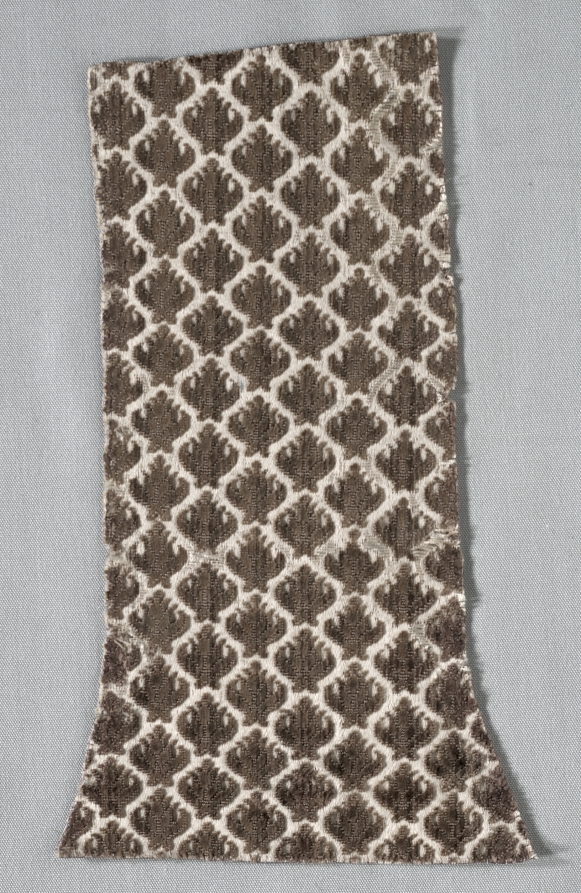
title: Velvet Fragment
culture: Italy, late 16th- early 17th century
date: late 1500s - early 1600s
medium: velvet (cut and uncut); silk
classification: Velvet